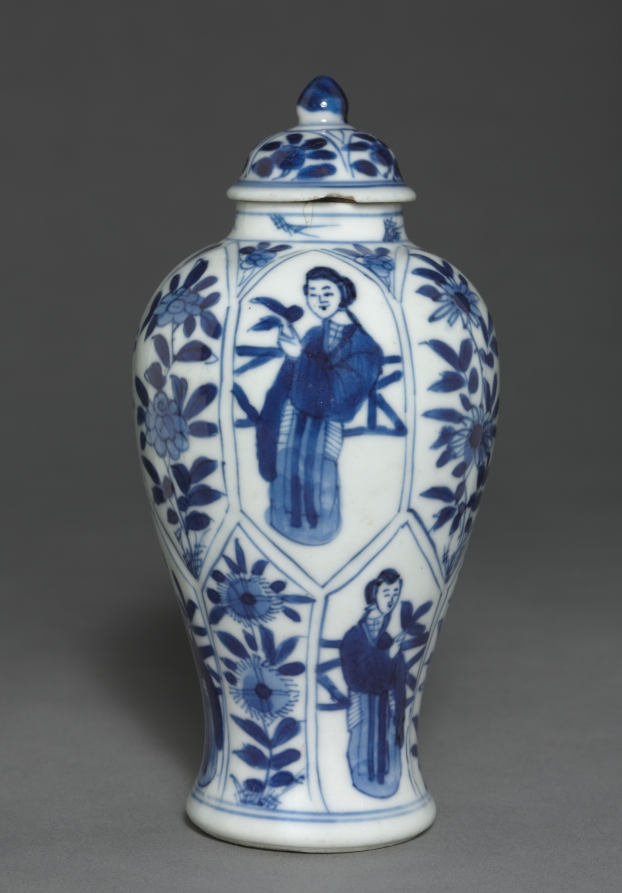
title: Jar with Cover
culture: China, Qing dynasty (1644-1911)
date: 19th Century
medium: porcelain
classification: Ceramic